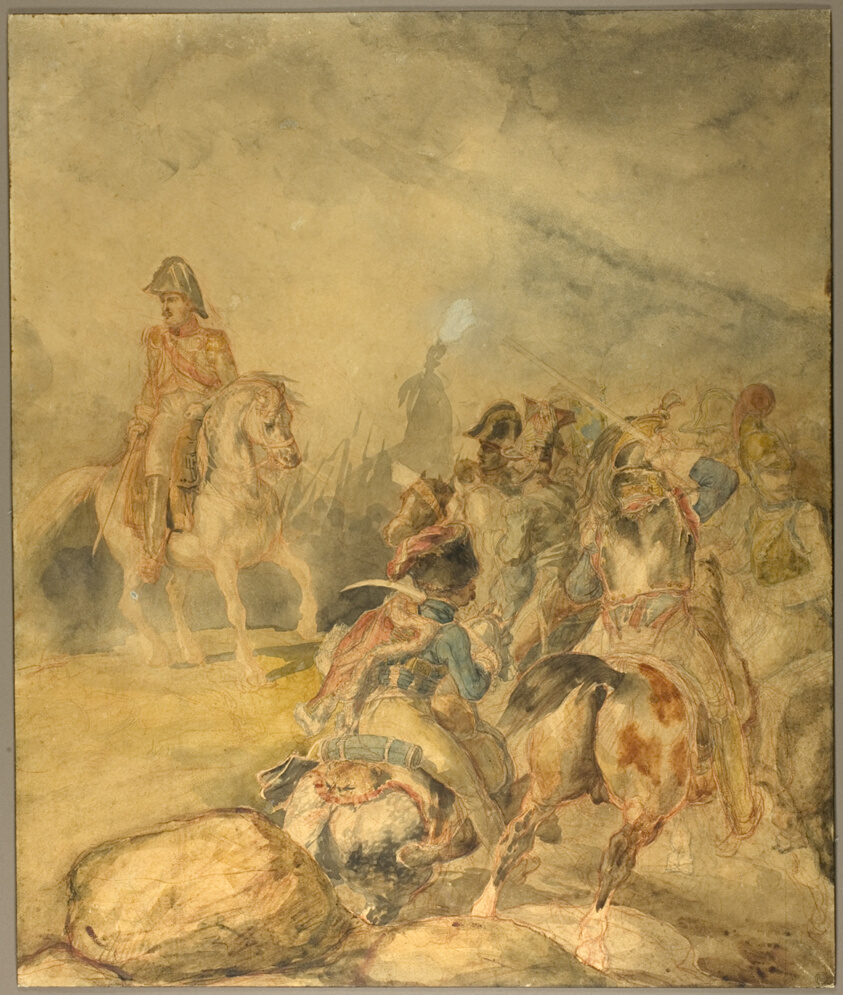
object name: Drawing and Watercolor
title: General of the First Empire Giving his Cavalry Orders to Charge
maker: Jean Louis André Théodore Géricault (French, 1791-1824)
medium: Watercolor, with red chalk and graphite, on cream wove paper, laid down on cream board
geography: France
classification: watercolor; drawings (visual works); prints and drawing